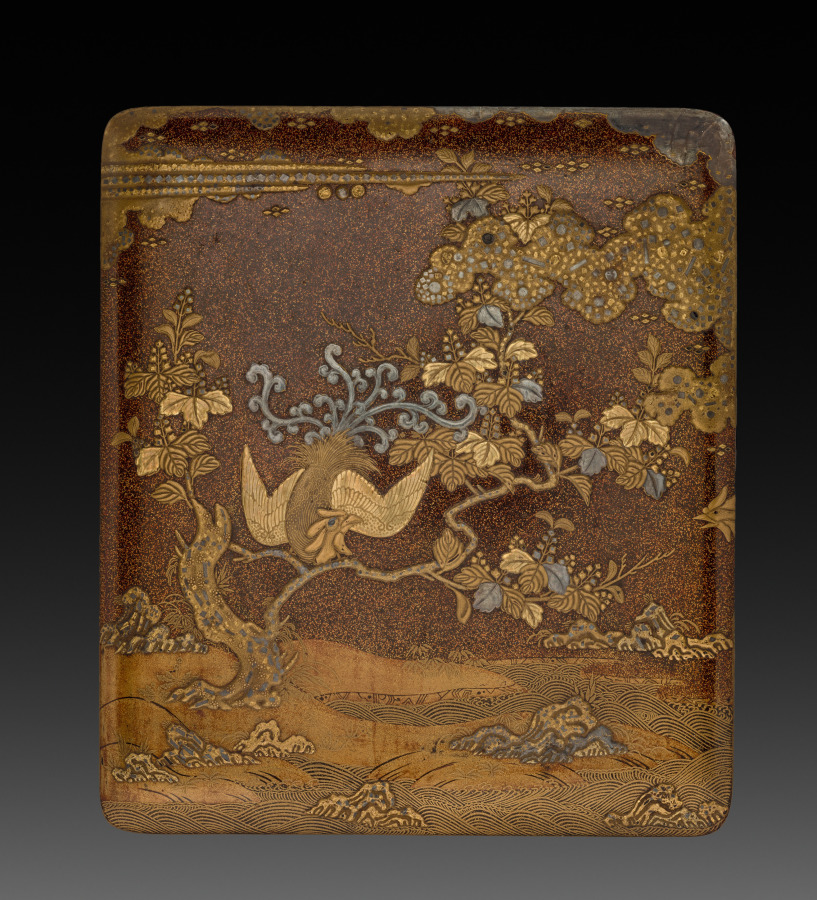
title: Writing Box (Suzuribako) with Phoenix in Paulownia (lid)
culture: Japan, Momoyama period (1573–1615)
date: c. 1573–99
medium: Lacquer on wood with sprinkled gold and silver powder (maki-e) and gold and silver foil application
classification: Lacquer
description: The only place the mythical phoenix will perch is in the paulownia tree. Along with the dragon, the bird is a symbol of imperial power in East Asia. This box––a container for an inkstone, brushes, and ink––is both functional and lavish, its dramatic effects achieved with a pear-skin ground decoration (nashiji) and sprinkled powder decoration in high relief (takamaki-e).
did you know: In contrast to the bright, celebratory motifs on the exterior, the interior of the box invites a more reflective mood with its autumn moonlit sky over chrysanthemums.